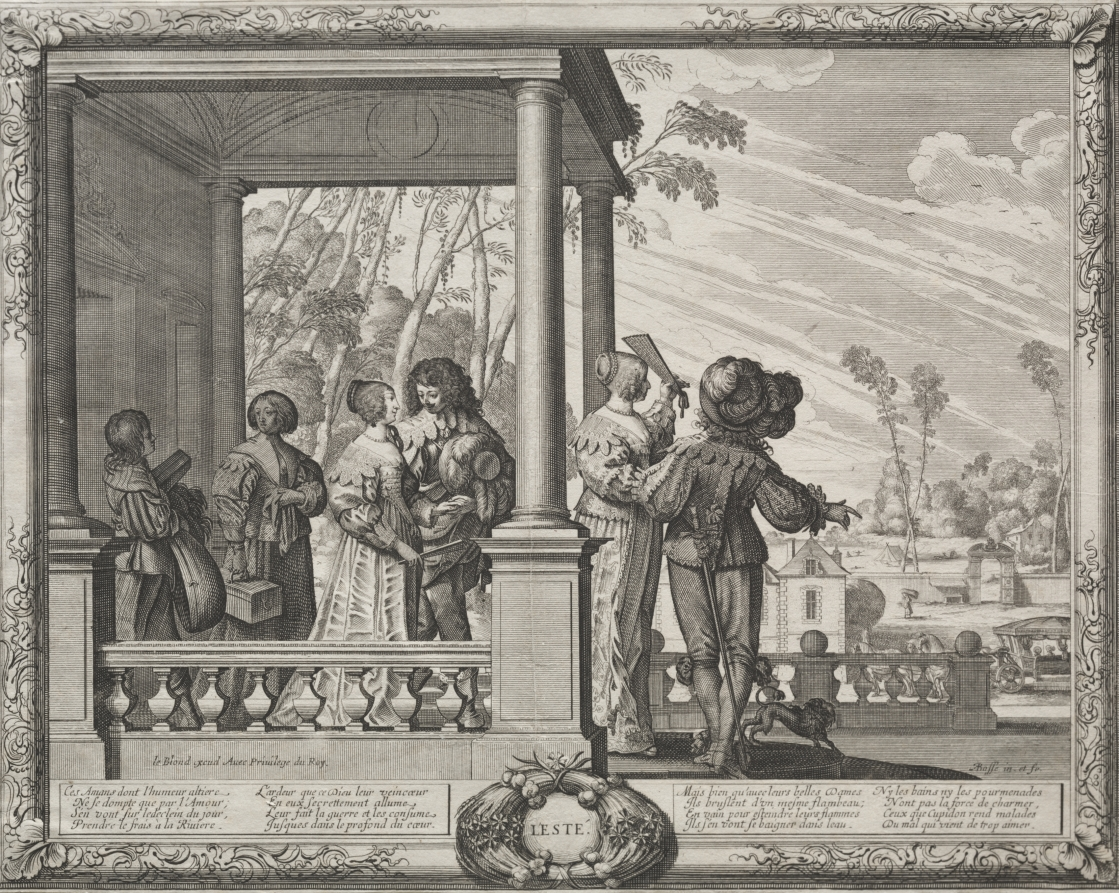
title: The Four Seasons: Summer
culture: France, 17th century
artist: Abraham Bosse (French, 1602–1676)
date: 1635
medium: engraving and etching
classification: Print